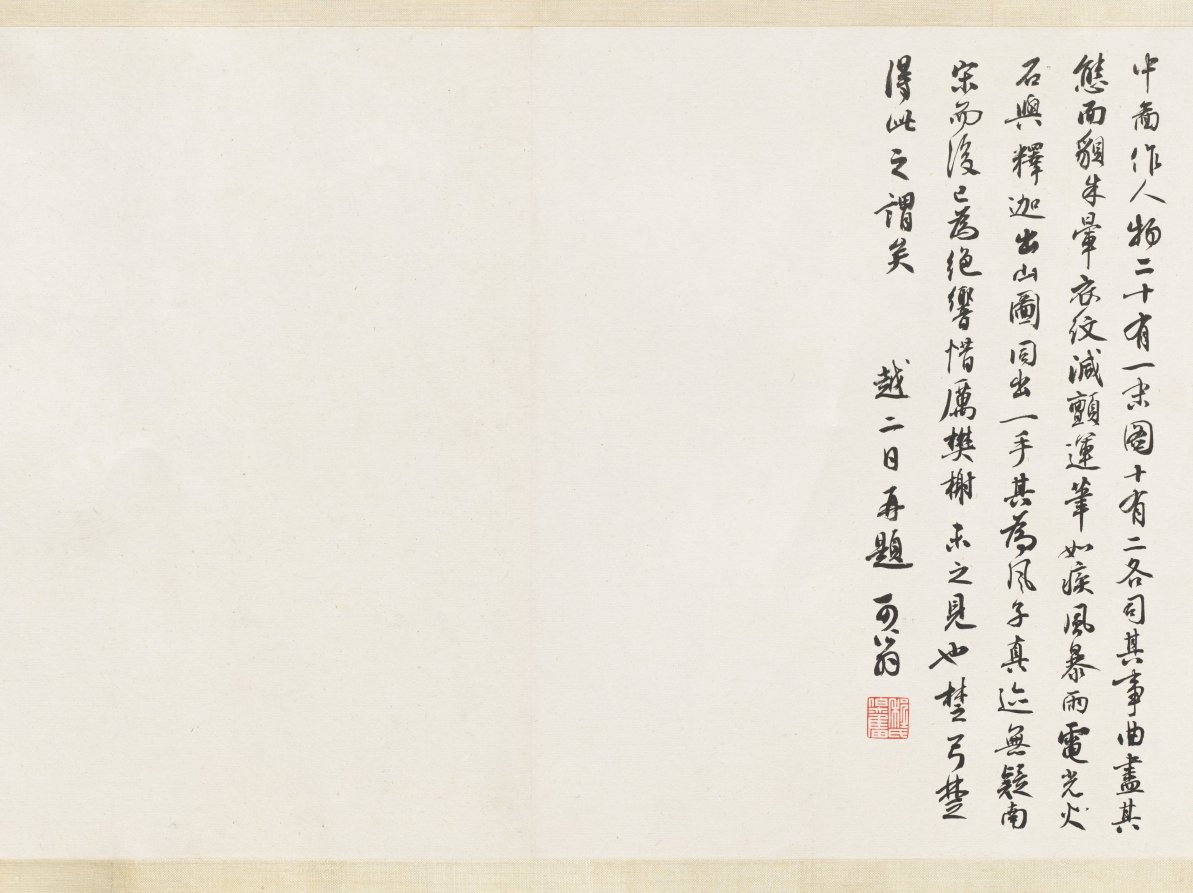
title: Sericulture (The Process of Making Silk)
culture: China, Southern Song dynasty (1127-1279)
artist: attributed to Liang Kai (Chinese, mid-1100s–early 1200s)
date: early 1200s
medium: Handscroll; ink and color on silk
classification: Painting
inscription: 3 colophons and 7 seals of Ch'eng Ch'i (20th c.).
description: By the Southern Song period, the economic center of the silk industry had shifted to the lower Yangzi delta, while the north continued to be troubled by wars. Divided into three sections, the handscroll illustrates 14 steps in the process of making silk, from the raising of silkworms to the weaving of silk cloth. The scroll’s scenes follow the illustrations of Lou Shou’s (1090–1162) Pictures of Tilling and Weaving (gengzhi tu), the first recorded painting of this genre, which was conceived in Hangzhou around 1145. However, in the Cleveland painting the artist groups several scenes of sericulture together under the roof of an open structure.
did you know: The painting is attributed to Liang Kai, a court artist active from about 1201 to 1204 at the Imperial Painting Academy in the city of Hangzhou, a major silk weaving center from that time to the present day.